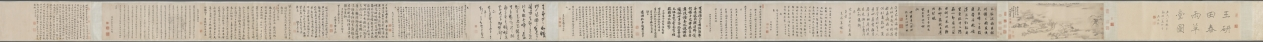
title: Spring Rain Thatched Hut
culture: China, Qing dynasty (1644-1911)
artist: Wang Jianzhang (Chinese, active 1621–1662)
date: 1650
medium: handscroll, ink on paper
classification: Drawing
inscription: Title by Wu Zhiying 吳芝瑛 (1868–1933), dated 1910.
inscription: 春雨草堂圖。庚寅仲春，為紫玄社兄畫於若耶溪上。 仲初王建章。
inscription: 12 colophons by Gong Weiliu’s 宮偉鏐 (1611–1680) contemporaries: Fang Gongqian 方拱乾 (1596–1667, jinshi of 1628); Jiang Cai 姜埰 (1607–1673); Liang Yizhang 梁以樟 (1608–1665); Du Shaokai 杜紹凱 (also named Du Jie 杜岕, 1617–after 1689), dated 1648; Zhao Kaixin 趙開心 (d. 1663), dated 1647; Zhao Erbian 趙而忭 (d. 1658); Yu Yaoguang 余耀光, dated 1649; Yao Quan 姚佺, dated 1648; Chen Taisun 陳台孫 (b. 1611, jinshi of 1640); (Monk) Shao 韶; Du Zhujin 杜祝進; and Tang Shi 唐時.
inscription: 此研田莊居士王建章為先太史紫元公所作春雨草堂圖也。居士字仲初，明崇禎間人，與先太史及惲香山相友善。喜畫佛像，自謂不讓李公麟。山水祖述董源，筆力雄健，有不可羈勒之概。香山稱其墨有五采，非世人所知。然性廉重，非同志不輕落筆，人得其寸圖尺縑，必相與忻賞，如獲蜼彝兕敦，非人世間物也！見先太史筆記，此圖寫雨景，而氣韻生動，勃勃於不能止。每一展覽，覺滿紙雲烟，墨瀋猶濕，如寫吾先人胸中未盡之邱壑也。圖後題詠，多一時名手，想見文采風流之盛。迄今二百餘年，舊德先疇，遺風未沫。吾子孫其永寶之，如與吾先人接謦咳於一堂，為感思之助，其敢作圖畫觀乎！同時香山亦有圖佚去己久，不知異日能為延津之合否。壬申長夏本昂重裝敬識。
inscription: Collectors' seals including: Gong Ben'ang 宮本昂 (1821–1874); Lian Qian 廉泉 (1868–1932); Wu Zhiying 吳芝瑛 (1868–1933)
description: With its striking simplicity, this painting captures the pure serenity of a private garden in the moist atmosphere of a spring morning on a small river. Painted in the style of Ni Zan, Wang Jianzhang dedicated this work to his patron-friend Gong Weiliu (1611-1680). Gong retired from government service after the fall of the Ming dynasty and constructed a garden-retreat at his native home in Taizhou, Jiangsu province. He invited scholars and poets from his literary society to contribute writings of his estate, which are here mounted together with the painting in this scroll.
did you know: Gong Weiliu, the owner of the estate portrayed here, had received his prestigious jinshi degree in 1643, but his official career was thwarted by the collapse of the Ming dynasty the following year.